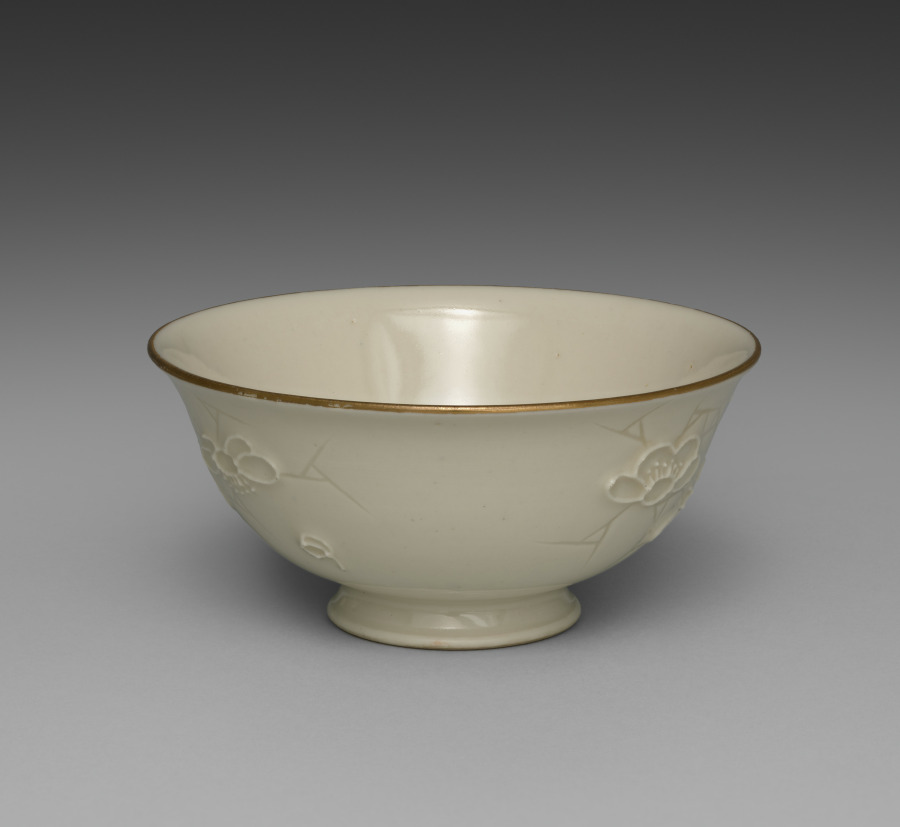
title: Bowl from Dining Set with Plum Blossoms and Cracked-Ice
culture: Japan, Meiji period (1868–1912)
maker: Seifū Yohei II (Japanese, 1844–1878)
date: c. 1875–78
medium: Porcelain with molded designs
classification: Ceramic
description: Each item in this set has a delicate low-relief design of flowering plum branches over scattered, intersecting lines meant to resemble the cracked-ice surface of a frozen body of water and is signed on the base in gold pigment. While Yohei II produced many fine works in underglaze blue, like those produced by Kiyomizu Shichibei, he also made works in quite different styles later in his career, from the early 1870 s. In 1873, he was appointed purveyor to the Industrial Center of Kyoto Prefecture, a designation associated with Kyoto’s efforts to reach an international market through the port of Kobe; and from 1875 until his death, he was involved in national-level projects to present Japanese ceramics across the world. It was during this period that Yohei III was apprenticed to Yohei II, and it has been suggested that this set may in fact be an early example of Yohei III’s work, which he signed with his teacher’s name. Decorated with flowers resembling Japanese textile motifs, the set calls to mind the design of Yohei II’s pair of vases with plum blossoms in the Victoria and Albert Museum. Here, the elaborate trees created for a formal public exhibition setting have been translated into the approachable blossoms of the genteel domestic environment. While the designs are consistent across the pieces, each raised flower petal and pistil and each incised line in the ice was done by hand, so the cups, bowls, and dishes are similar yet unique. The bottoms of two boxes once identified the set’s owner, but the information has been deliberately obscured with black ink. However, inscriptions still visible appear to indicate two occasions, once at the end of July 1886 , and once again in June 1916 , when parts of the set were requested from Hokura in Niigata Prefecture. The location corresponds to a neighborhood in the present-day city of Jōetsu. The surname Tsuji 辻 also appears on a paper tag affixed to one of the box cloths. Future research may possibly reveal more about their provenance. A vase by Yohei III in a private collection combines the formal grandeur of the Yohei II vases in the Victoria and Albert Museum with the gentler design of this dining set, placing flowering plum trees against soft, scalloped-edge clouds resembling those in golden screens.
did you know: The dining wares have a creamy white coloration that the four boxes containing them identify as Korean in style.